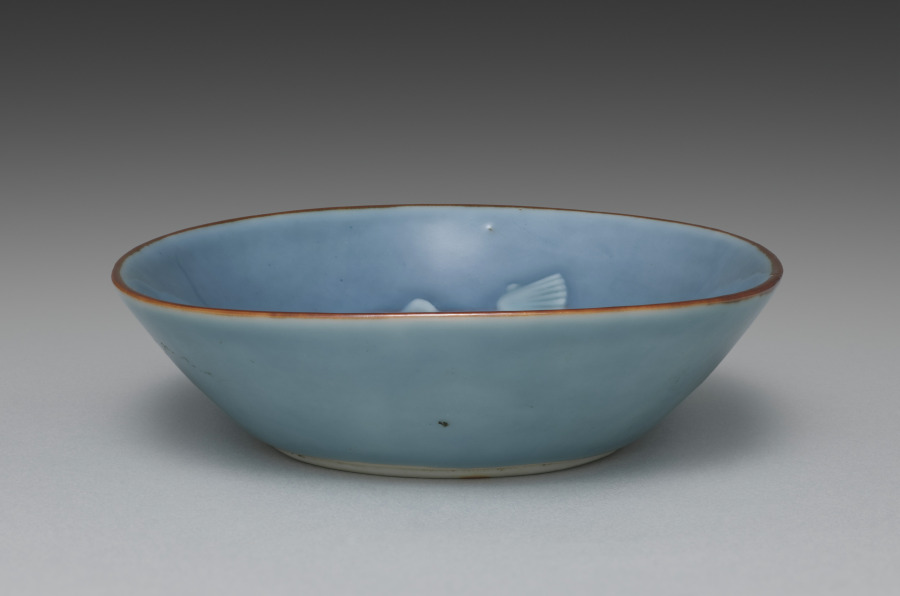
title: Dish from Dishes with Shells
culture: Japan, Taishō period (1912–26)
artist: Seifū Yohei IV (Japanese, 1872–1951)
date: 1914–46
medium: One from a set of five dishes; porcelain with blue glaze, iron oxide, and molded design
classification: Ceramic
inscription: 清風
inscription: 清風造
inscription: 清風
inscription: 成山清風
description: Yohei IV chose an aquatic theme for this set of five mukōzuke, side dishes. He added an iron oxide rim and used a concentrated blue glaze on both the interior and exterior. The glaze, named on the box lid, is his father’s “evening moon” (tsukiyoi) color. The conch in relief takes up the entire bottom of the dish. Up the sides are two snails on one end and on the other a scallop. This results in a boldly graphic, less realistic effect.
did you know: This set of dishes, mukōzuke, could be used for serving small side dishes at a tea gathering.